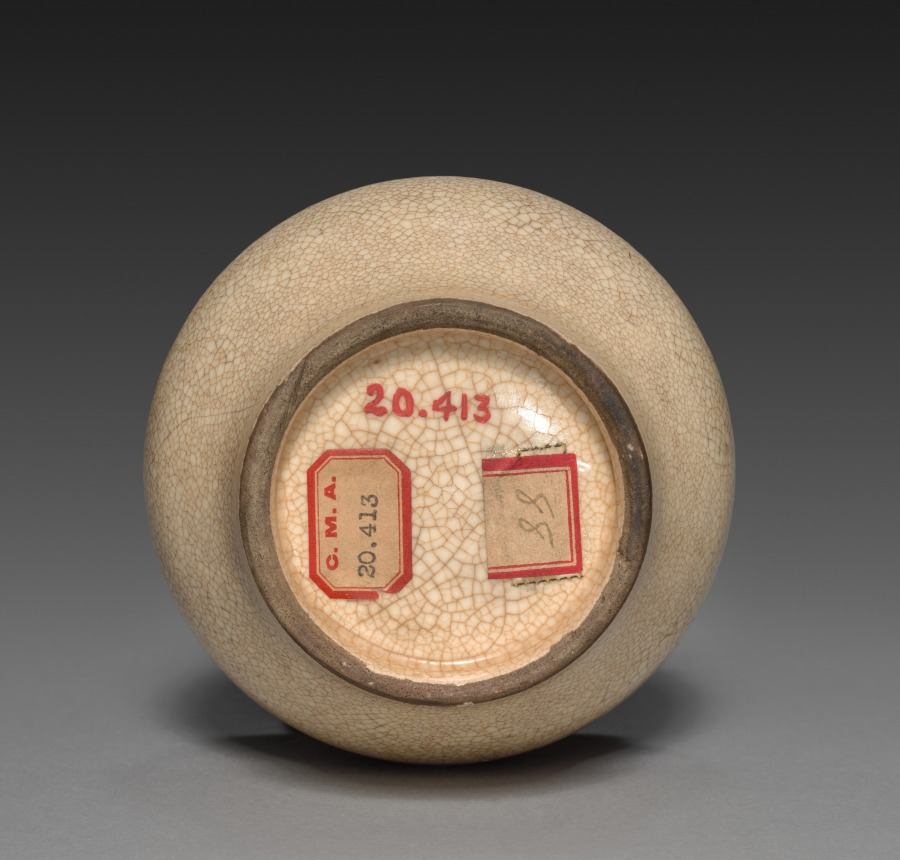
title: Jar (Satsuma ware)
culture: Japan, Meiji period (1868–1912)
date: 1868–1912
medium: pottery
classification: Ceramic